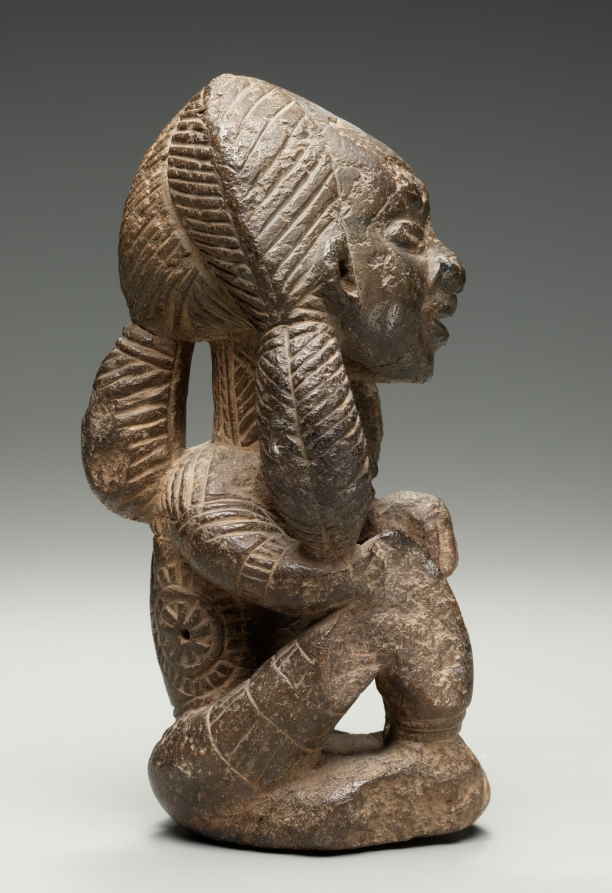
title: Figure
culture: Africa, West Africa, Sierra Leone, Sapi-style carver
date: possibly early 1400s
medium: soapstone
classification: Sculpture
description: The most varied group of soapstone figures and heads has been found in the homelands of the Kissi. Calling them pomda ("images of the dead"), the Kissi placed them in ancestral shrines, offering them the last seeds at sowing times and the first fruits of the harvest. However, the sculptures are believed to have been made centuries ago by the ancestors of the Kissi, the so-called Sapi people.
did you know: Sapi sculptors worked in stone—like in this sculpture—as well as ivory.